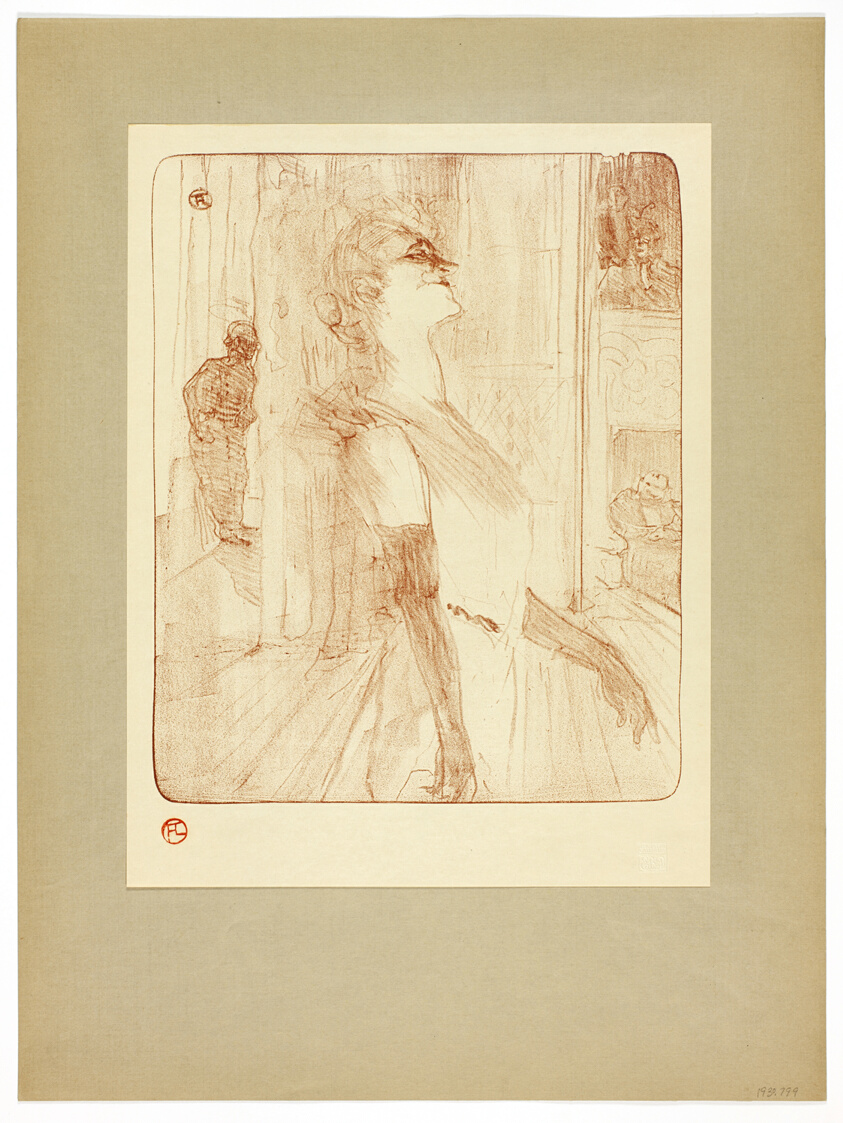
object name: Print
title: On the Stage, plate one from Yvette Guilbert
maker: Henri de Toulouse-Lautrec (French, 1864-1901); printed by Westminster Press (English, 20th century); published by the Ernest Brown & Phillips (English, 20th century)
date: 1898, printed 1930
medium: Lithograph (crayon with scraper) in sanguine (red-brown) on cream wove paper hinged at top corners to gray-brown wove paper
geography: France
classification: lithograph; print; prints and drawing